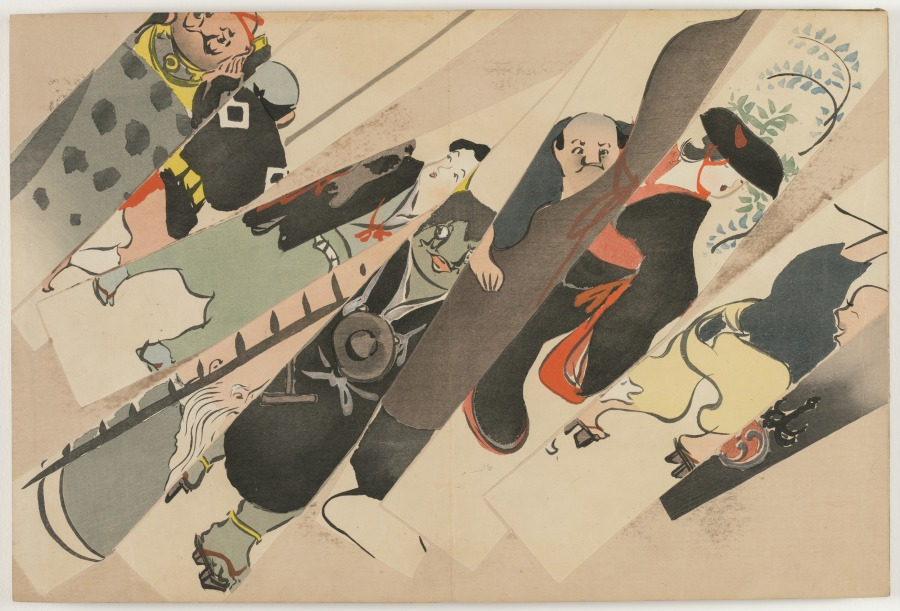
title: Flowers of a Hundred Worlds (Momoyogusa): Otsu-e (Otsu-e)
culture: Japan, Meiji period (1868–1912)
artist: Kamisaka Sekka (Japanese, 1866–1942)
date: 1909–10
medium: color woodcuts with gold and silver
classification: Bound Volume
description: This print from a set of three woodblock printed albums displays the graphic design prowess of Kamisaka Sekka. The images were first distributed one by one to subscribers to the series but later were reissued in bound form, like this book, for mass consumers. Each print features a vignette taken from nature or Japanese literature. Many of the scenes have a long history in Japan, originating in the 900s or 1000s and having been interpreted by all manner of artists since that time. Sekka’s selections hew closely to precedents from the Rinpa style originated by painter Tawaraya Sōtatsu (c. 1570–c. 1640) and calligrapher Hon’ami Kōetsu (1558–1637).